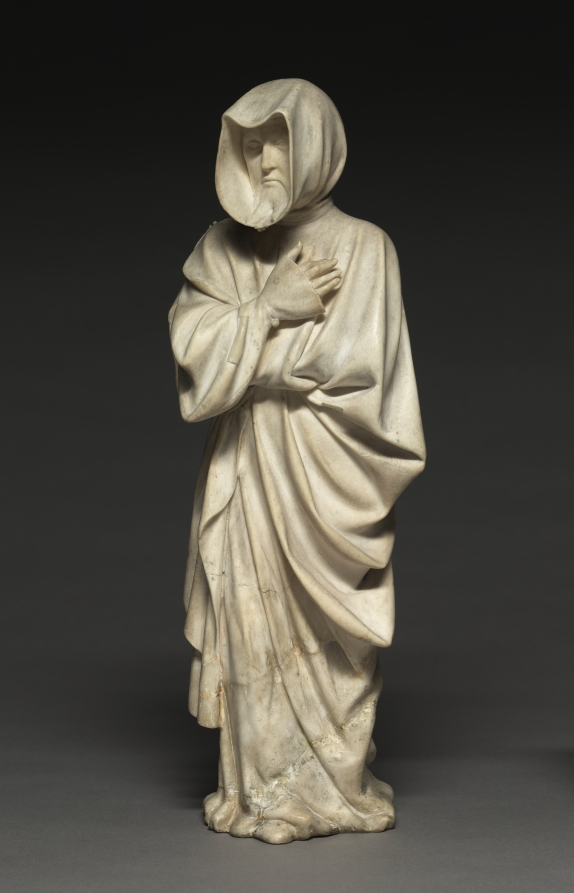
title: Mourner from the Tomb of Philip the Bold, Duke of Burgundy (1364–1404)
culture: Netherlands, active Dijon, 15th century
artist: Claus de Werve (Netherlandish, 1380–1439)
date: 1404–10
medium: vizille alabaster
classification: Sculpture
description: This figure comes from the tomb of Duke Philip the Bold from the church of Champmol near Dijon (Burgundy, France). Philip, who founded the monastery and designated it as his burial place, hired the best artists, many of whom came from the Netherlands. While the commission was given in 1381, the work was not completed until 1410, six years after the duke’s death. This mourner is unusual for the time because it is not carved as a static low relief on the pedestal of the tomb but interacts with the viewers and their fellow procession members. The lifelike quality of the figure is due in large part to the alabaster. Its softness allowed artists to carve details into the material, and the transparent, milky white stone could also be polished to a high gloss.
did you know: A plaster cast of this mourner decorates the empty niche in the Tomb of Philip the Bold in Dijon, France.